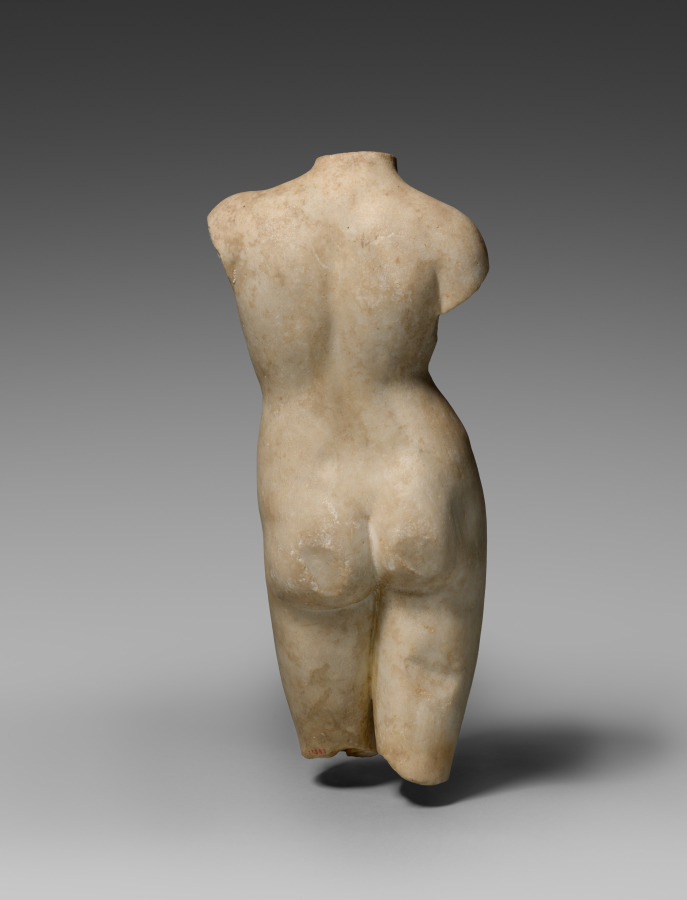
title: Torso of a Woman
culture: Italy, Roman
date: 100 BCE–400 CE, or modern, before 1927?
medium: marble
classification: Sculpture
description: Even without her head, limbs, or additional attributes, the nudity of this female statuette connects her to Aphrodite, goddess of love, or Venus, her Roman parallel. Female nudity was first realized in large scale in the mid-300s BC by the famous Athenian artist Praxiteles (395–330 BC), whose sculpture of Aphrodite was prominently displayed in a shrine in the city of Knidos (in present-day Turkey). For centuries thereafter, the female nude became a great favorite for Greek and Roman artists. The tradition continued into modern times, leading some to question the ancient origins of this sculpture.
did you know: The nudity of this female statuette connects her to Aphrodite or Venus, goddess of love.